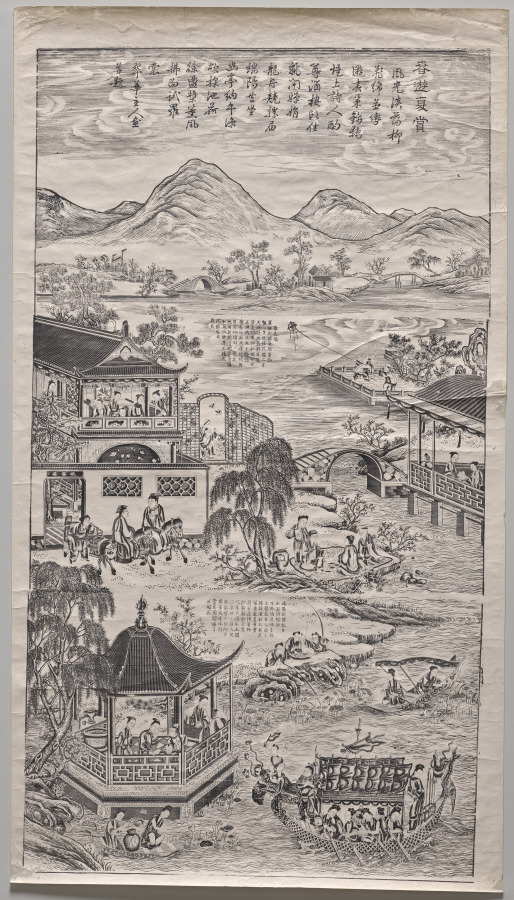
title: Touring in Spring, Enjoying Summer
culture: China, Qing dynasty (1644–1911), Qianlong reign (1736–95)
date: 1736–95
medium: Polychrome woodblock print; ink and color on paper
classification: Print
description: In the 1600s, printing flourished in such Jiangnan cities as Nanjing, Suzhou, Hangzhou, and Huizhou, evolving from privately enjoyed illustrated books printed in color to more commercialized single-sheet color prints that were hung on walls and became part of the rich urban visual culture.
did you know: Woodblock printing in color reached a height in China in the 1600s to 1700s. The prints were executed by means of sets of separate blocks, each carved to print a different color.